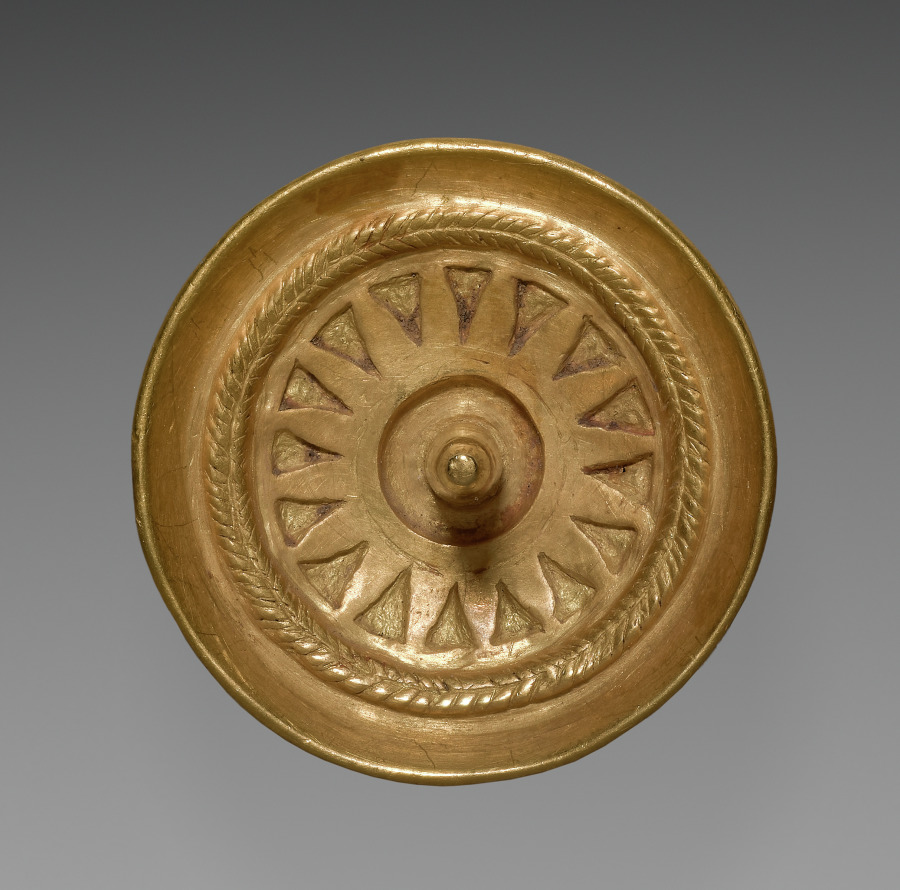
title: Ear Spool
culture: Panama, Conte style, 5th - 10th century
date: c. 400–900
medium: hammered gold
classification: Metalwork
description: Harvard archaeologists excavated this and seven other ornaments from several burials at Sitio Conte, a cemetery famous for its lavish graves of powerful chieftains. The young man buried in Grave 26 was such a chief. His status was stunningly memorialized by 21 human companions and 475 objects, many of them personal ornaments made of gold, including a large chest plaque and a rod-shaped ear ornament.